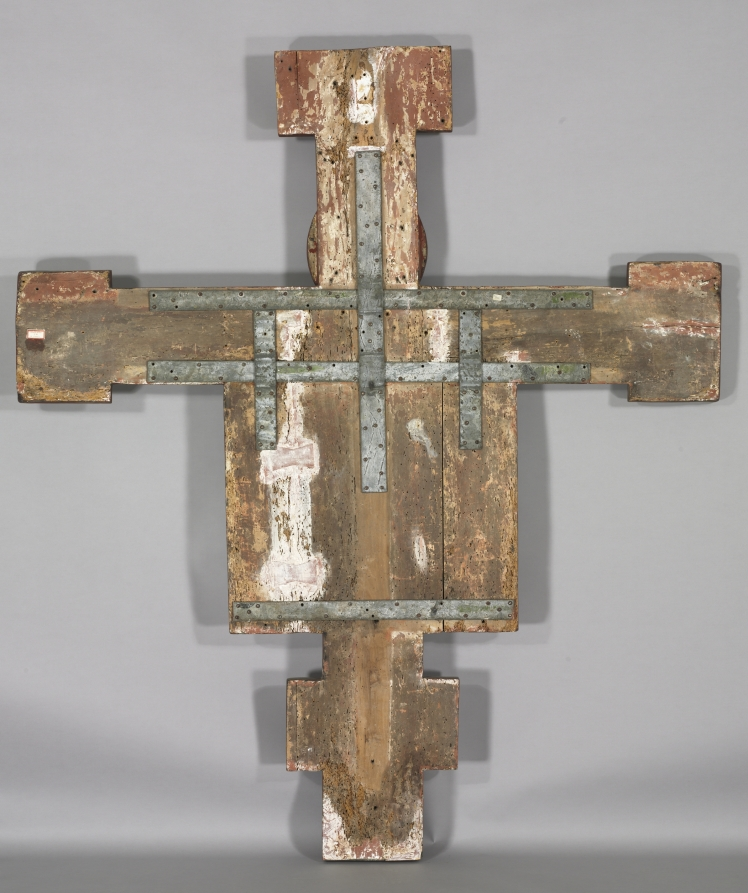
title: Crucifix with Scenes of the Passion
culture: Italy, Pisa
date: c. 1230–40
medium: tempera with gold on panel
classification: Painting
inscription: signed below: [GH]AEL q./...VINI/IT (i.e. Ghael quondam ... vini)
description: Large painted crucifixes dating from the 1100s and 1200s are among the earliest surviving Italian panel paintings. Large crosses, like this beautiful example, were typically suspended high above an altar in the main apse of Italian churches. Smaller crosses were placed on or just above altars in small side chapels. Such crosses served as the visual focus for devotion and symbolized the Eucharistic sacrament performed by the priest on the altar below. This crucifix shows Christ alive on the cross as the triumphant savior of mankind. Smaller images on the "apron" represent images of Christ's Passion (to the left) and his death and Resurrection (to the right). On the far left terminal appear the mourning Virgin and Saint John the Evangelist, while on the right the viewer is shown Saint James Major and Saint Bona, patroness of the city of Pisa. The concluding event, the Ascension of Christ, once appeared on the upper terminal, just above the Virgin and Apostles. The figure of Christ is painted in a severe and hieratic style suggestive of medieval Pisa's artistic and commercial links with the Byzantine East. The appearance of Saint Bona on this cross may suggest that it was made for the Church of S. Martino in Pisa, where Franciscan nuns tended the holy woman's relics.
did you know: Although the artist did sign this panel at the bottom, the signature is illegible, his first name perhaps being Michael.